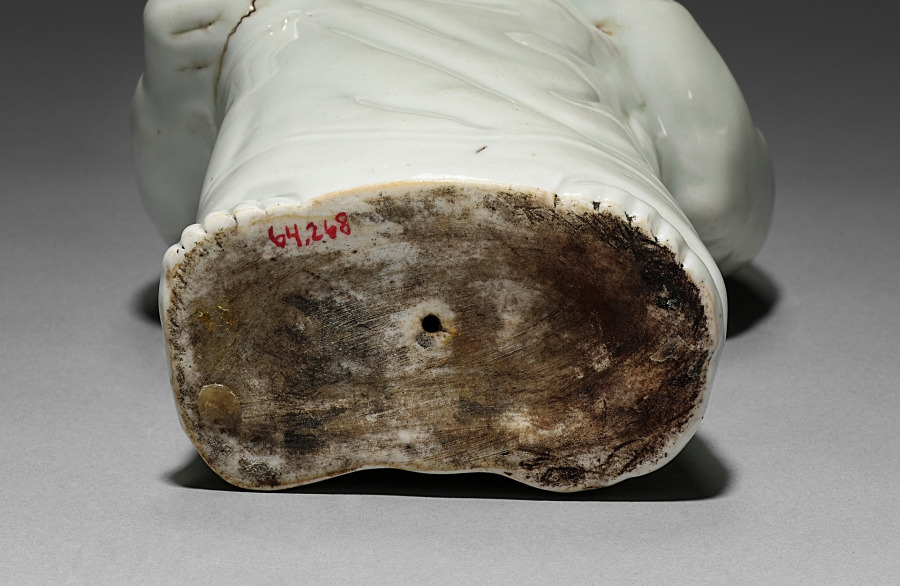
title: Standing Figure of a Sumo Wrestler, Arita Ware (?)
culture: Japan, Edo period (1615–1868)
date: 1700s-1800s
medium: porcelain, molded and carved, with celadon overglaze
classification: Sculpture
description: Catalogue of the Severance and Greta Millikin Collection (CMA, 1990): 85, no. 137.